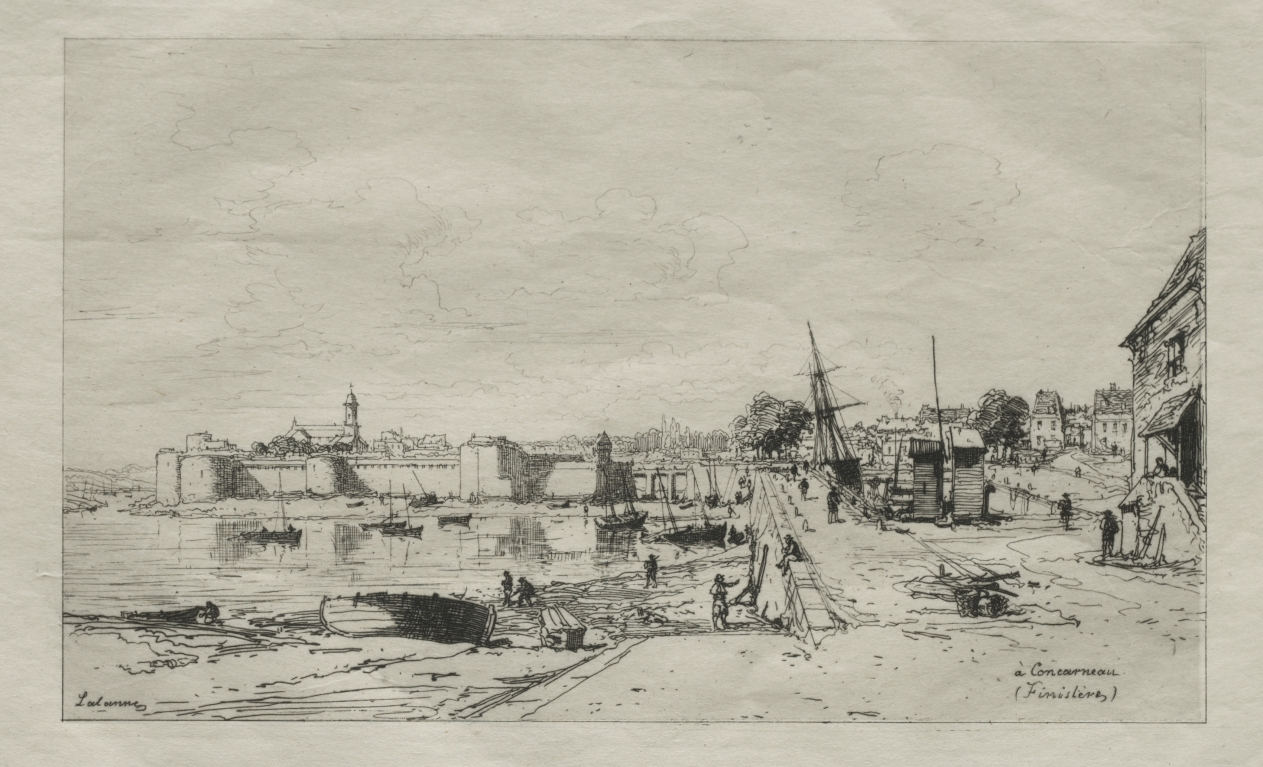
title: À Concarneau (Finistère)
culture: France, 19th century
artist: Maxime Lalanne (French, 1827–1886)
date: 1874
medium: etching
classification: Print